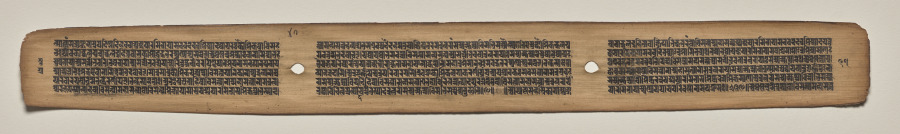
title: Text, folio 47 (verso), from a Manuscript of the Perfection of Wisdom in Eight Thousand Lines (Ashtasahasrika Prajnaparamita-sutra)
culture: Eastern India, Bihar, Vikramashila Monastery. Painting: Nepal, Kathmandu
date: Sunday, September 14, 1119 (year 239 of the Newar Samvat in the month of Ashvina)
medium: gum tempera and ink on palm leaves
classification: Painting